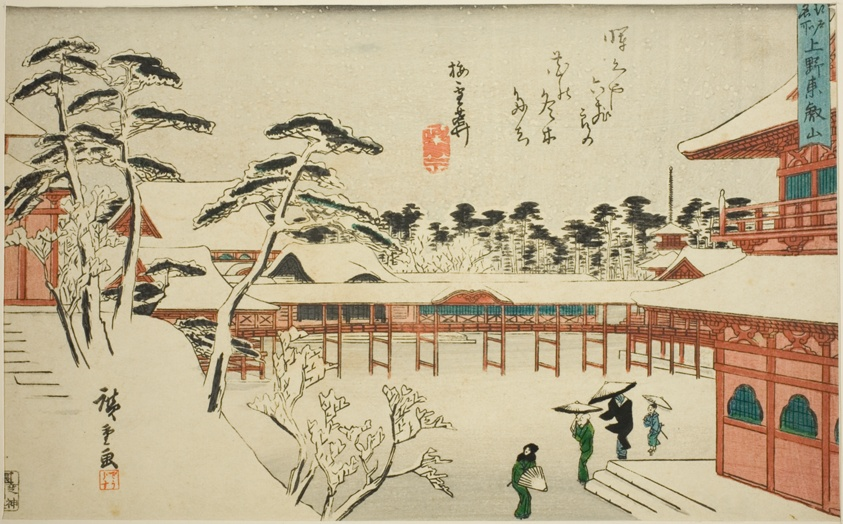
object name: Print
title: Toeizan Temple at Ueno (Ueno Toeizan), from the series "Famous Places in Edo (Edo meisho)"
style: Japanese (culture or style)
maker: Utagawa Hiroshige 歌川 広重; Japanese, 1797-1858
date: c. 1840/42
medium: Color woodblock print; oban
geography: Japan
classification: woodblock print; print; asian art